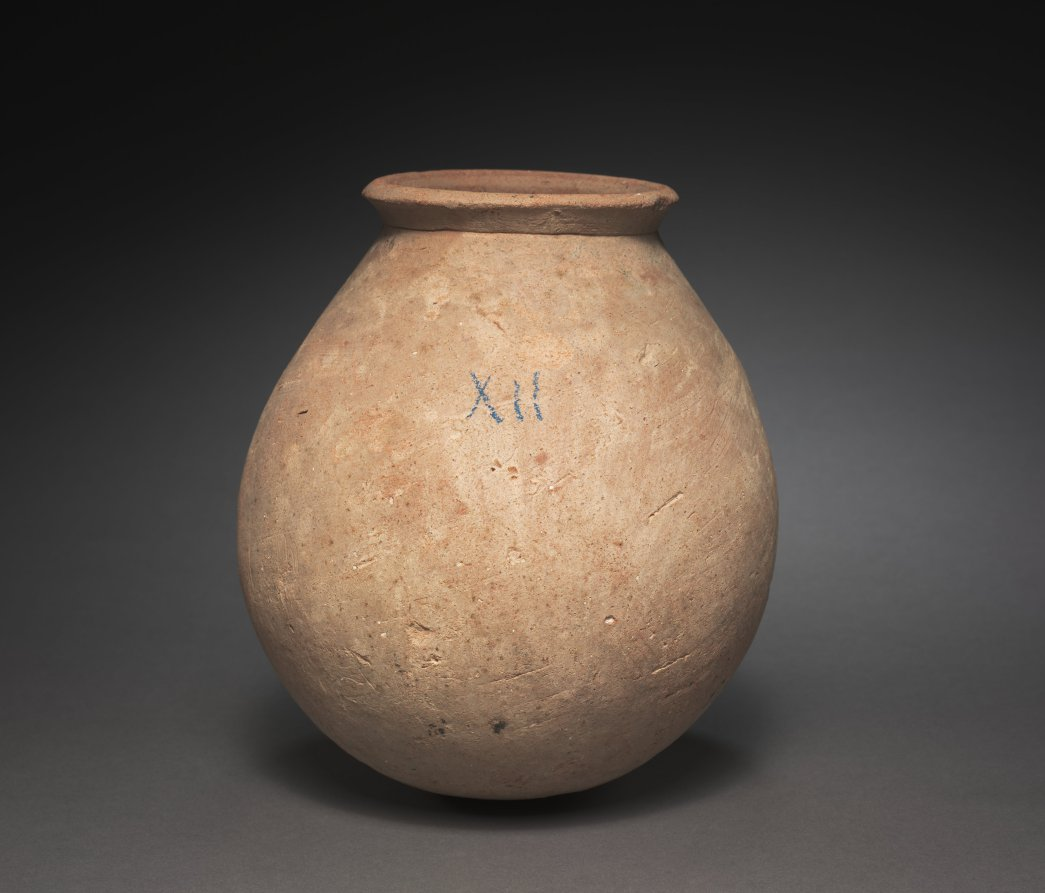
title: Water Jar (Globular Jar)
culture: Egypt, Haraga, cemetery S, tomb 366, excavated in 1914, Middle Kingdom (2040–1648 BCE), Dynasty 12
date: 1980–1801 BCE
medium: marl clay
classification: Vessels